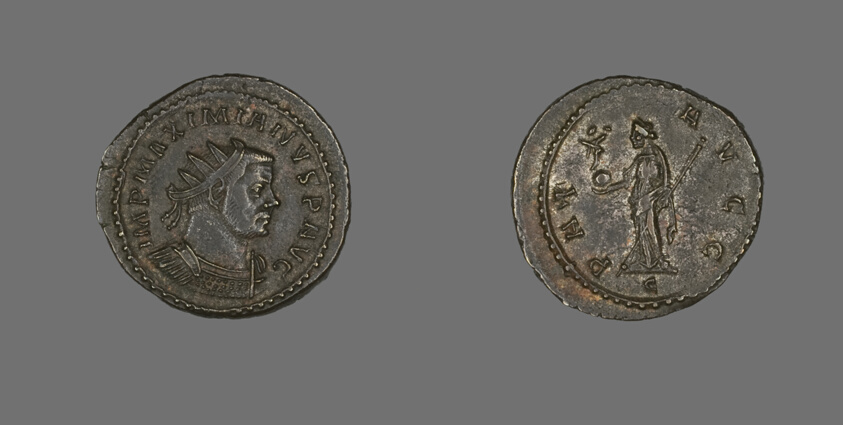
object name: Coin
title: Coin Portraying Emperor Marcus Aurelius Valerius Maximianus (Maximian or Maximianus I)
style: imperial (roman), ancient, roman (ancient, style or period)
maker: Roman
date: 286/305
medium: Bronze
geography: Roman Empire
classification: coin; ancient art